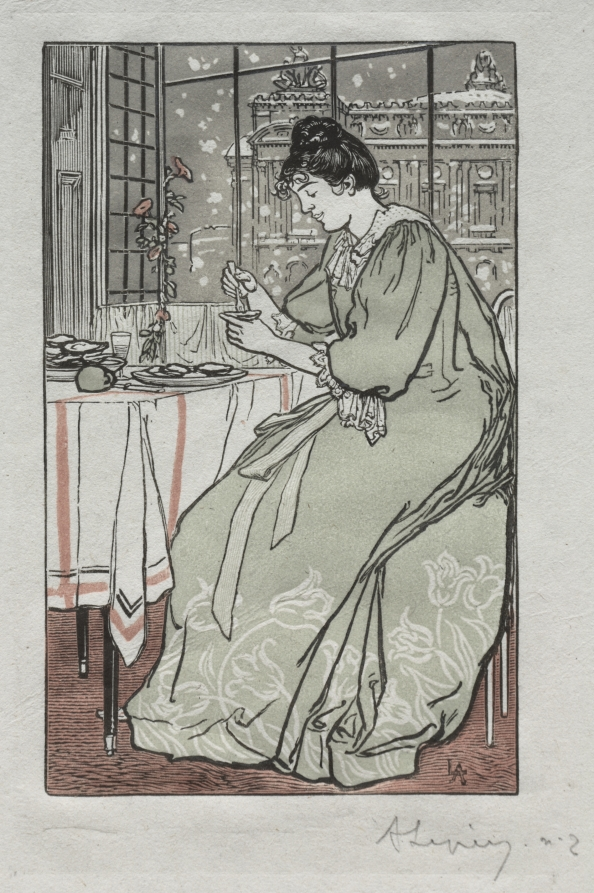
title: Paris Almanac, 1897: Winter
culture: France, late 19th Century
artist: Auguste Louis Lepère (French, 1849–1918)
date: 1897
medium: wood engraving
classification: Print